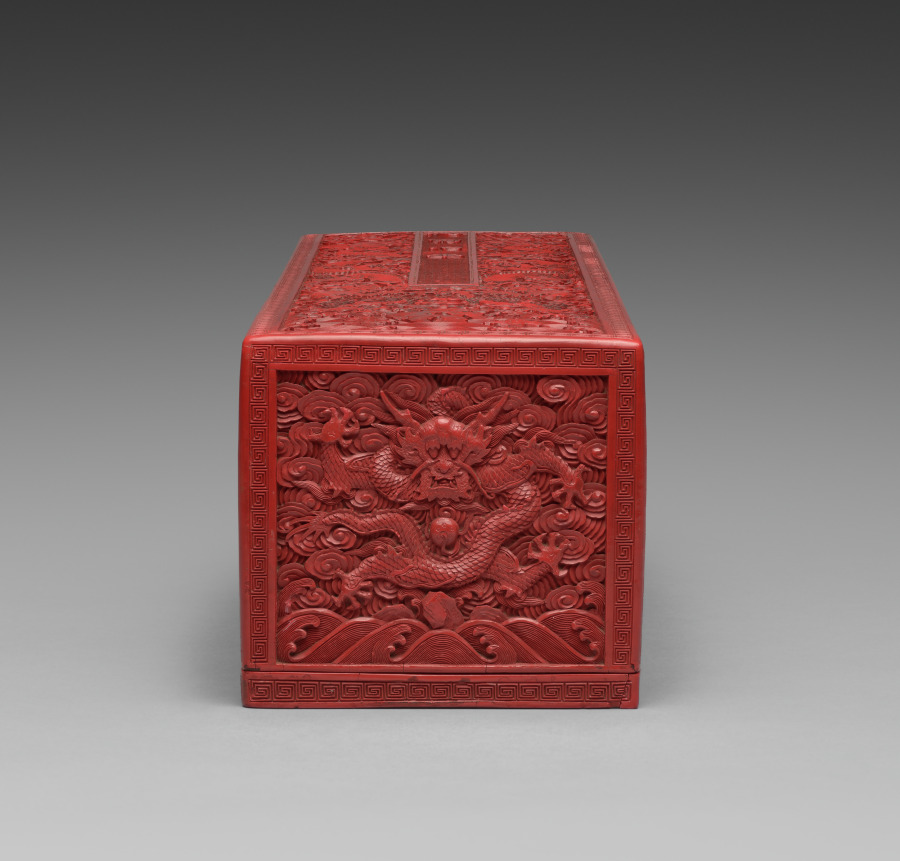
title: Carved Lacquer Scroll Box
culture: China, Qing dynasty (1644–1911), Qianlong reign (1736–95)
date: 1736–95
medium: Red carved lacquer on wood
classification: Lacquer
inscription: 心寫治平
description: The elaborate design, superior craftsmanship, and inscription carved into the red cinnabar lacquer proclaim the imperial pedigree of this scroll box. On either end is a five-clawed dragon, a design reserved only for an emperor. More dragons twist and wind through swirling clouds and waves along the length of the box’s sides and top. The carving is intricate and vigorous, while the design is controlled and regular. This box housed the private portraits of the Qianlong Emperor, his empress, and 11 other favorites among his presumed 40 or more wives during his 60-year reign. It was commissioned to be made in Suzhou when no more portraits were added to the scroll. An entry in the imperial workshop records relates to the Cleveland box. It states that in 1787, a box design with a dragon pattern, including the inscription, In his heart is envisioned a peaceful reign, was sent to a Suzhou workshop. Imperial portraits were collected in the Chonghua Palace in the Forbidden City, and the emperor’s portrait was kept in this red lacquer box from Suzhou.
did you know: This is the original box for the handscroll Portraits of the Qianlong Emperor and His Twelve Consorts, CMA 1969.31.